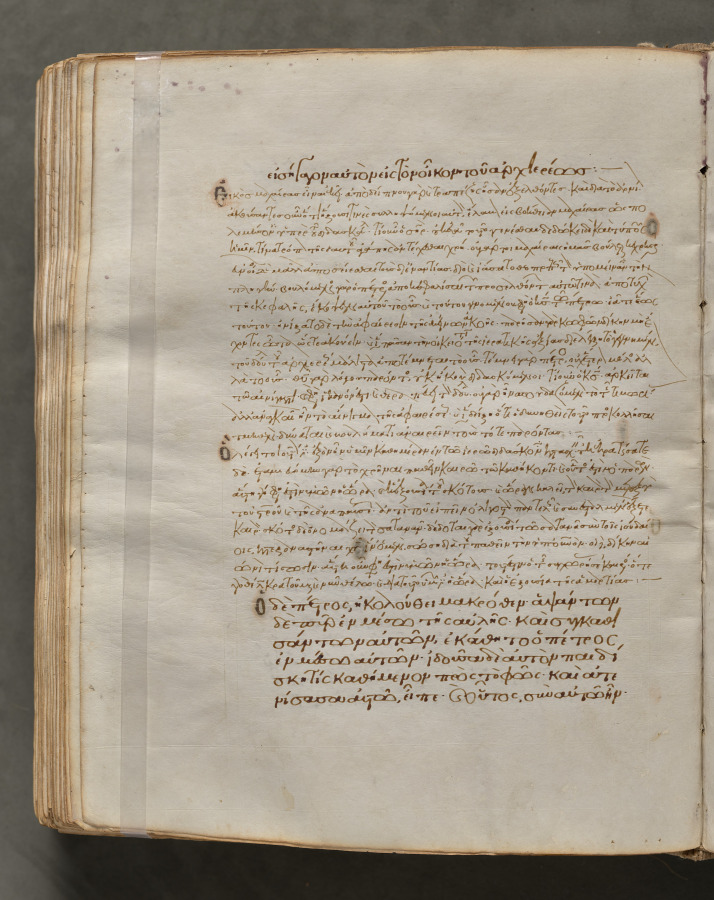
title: Text, folio 311 (verso), from a Gospel Book with Commentaries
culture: Byzantium, Constantinople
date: c. 1000–1100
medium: ink, tempera, and gold on vellum; leather binding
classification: Bound Volume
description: Each of the four gospels in this book opens on a page with brilliantly illuminated borders depicting the author of the text as well as birds—principally peacocks, symbols of the immortality of the soul—and fountains, representing the fountain of life and the salvation of the soul. This volume consists of 428 leaves with texts in Greek. Its level of sophistication suggests that it was probably written and decorated in a monastery in Constantinople.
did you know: Gospel books were carried in procession through Byzantine churches.